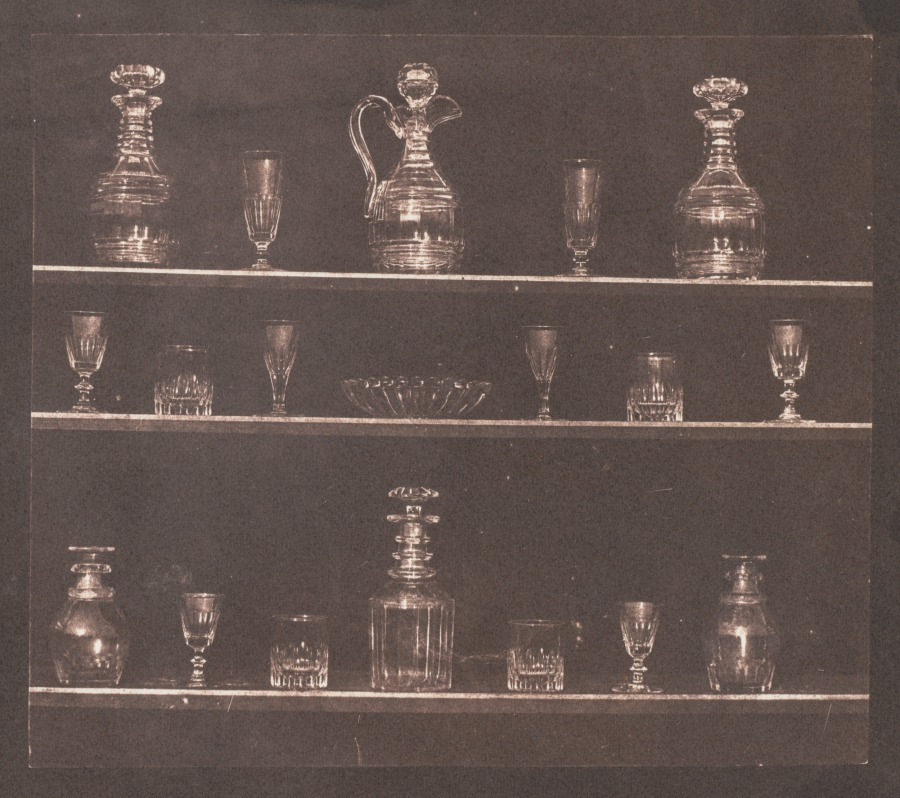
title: Articles of Glass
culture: England, 19th century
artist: William Henry Fox Talbot (British, 1800–1877)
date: 1844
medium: salted paper print from calotype negative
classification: Photograph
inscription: Written in black ink on verso: "LA 4"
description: Pursuing such diverse interests as language, mathematics, botany, and optics, William Henry Fox Talbot was a prominent scholar and scientist. In 1839 he invented the first system of positive and negative photography—the calotype process. The basis of all modern photography, the calotype's paper negative made possible the infinite reproduction of prints from a single negative. In Articles of Glass, three rows of sparkling glass objects are isolated against a dark background, illustrating the new medium's ability to capture the nuances of light and record reality. A remarkable technical and aesthetic achievement, the image testifies to Talbot's artistry and classical sensibilities, expressed through his use of symmetry and a central focus. This image was included in Talbot's The Pencil of Nature (1844), one of the first books illustrated with actual photographic prints.